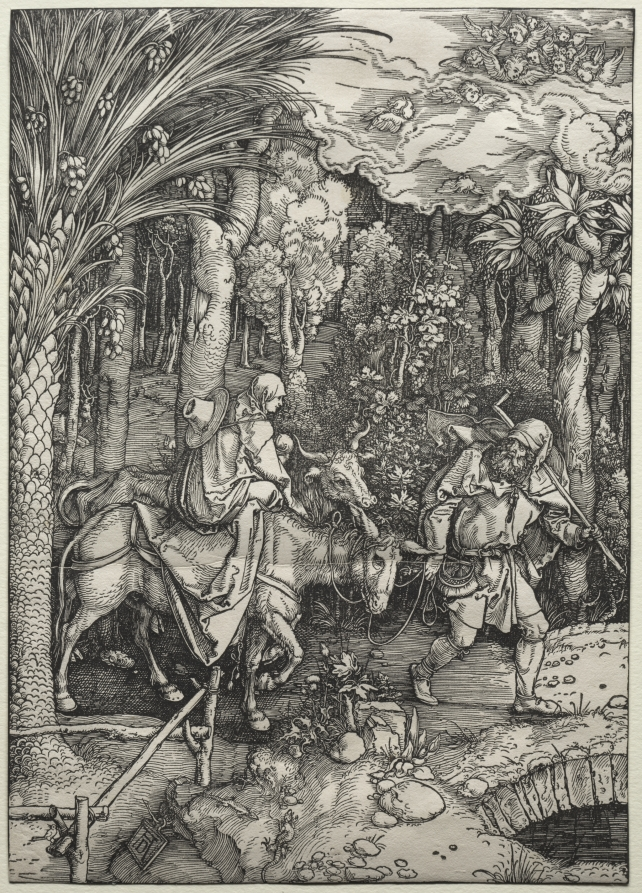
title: The Flight into Egypt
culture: Germany, early 16th Century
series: The Life of the Virgin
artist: Albrecht Dürer (German, 1471–1528)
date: c. 1503–5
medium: woodcut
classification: Print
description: Although Dürer’s woodcut depicts a later event in the biblical narrative, the composition is similar to the scene from the Mirror of Holiness, "Mary and Joseph Travel to Bethlehem" CMA 2005.145.24.b—even to the inclusion of an ox. Mary, Joseph, and the infant Jesus fled Jerusalem for Egypt after Joseph was warned in a dream that Jesus’s life was in danger. The dense, dark forest through which the Holy Family travels seems to close threateningly around them. While the Indian artist envisioned a “pack beast” as a camel, Dürer invented a Middle Eastern landscape by incorporating a palm tree and other curious vegetation.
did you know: The dense forest setting of the Flight into Egypt includes tropical trees and lizards.